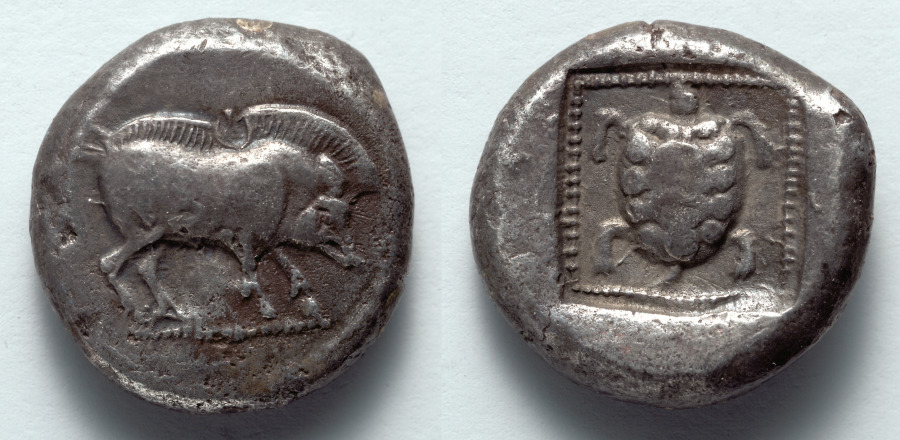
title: Stater: Boar (obverse); Tortoise (reverse)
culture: Greece, Lycia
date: 500–460 BCE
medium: silver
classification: Coins